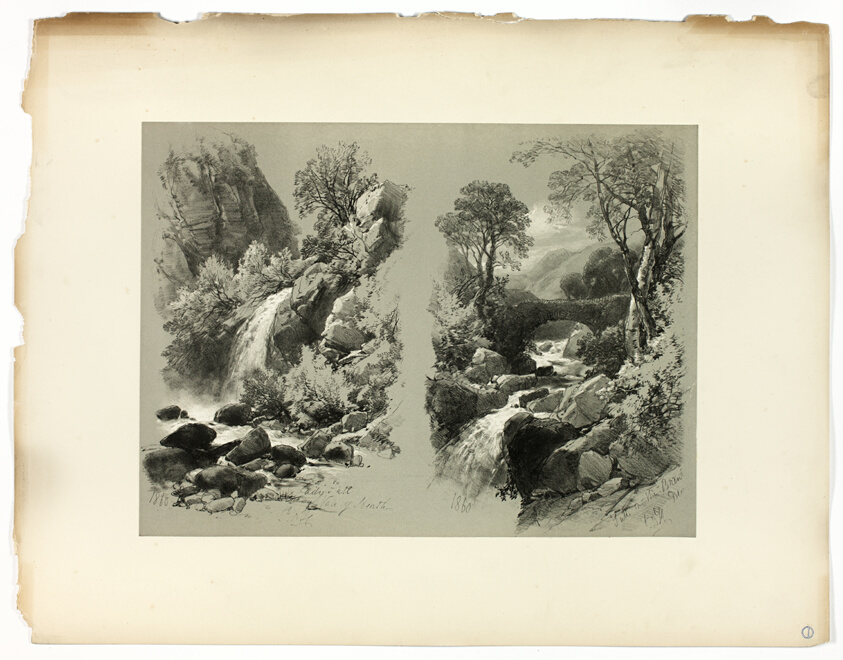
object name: Print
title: Lady Fall, Vale of Heath, and Fall on the Brent, from Picturesque Selections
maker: James Duffield Harding, (English, 1798-1863); Published by W. Kent and Co.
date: 1860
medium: Lithograph on paper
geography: England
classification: lithograph; print; prints and drawing